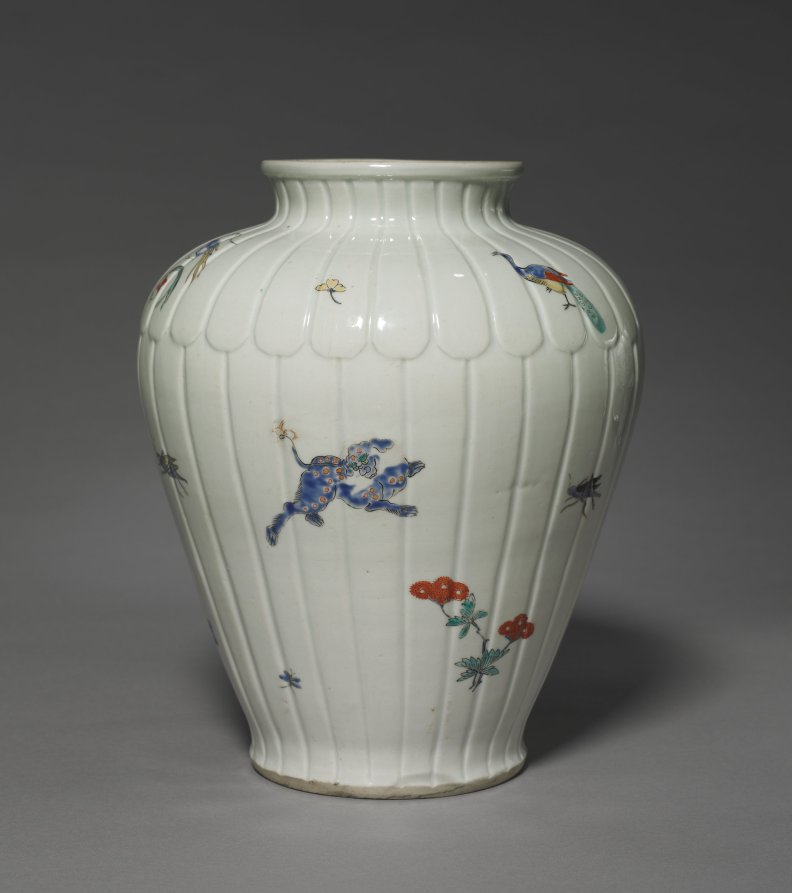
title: Vase with Floral, Insect, Bird, and Chinese Designs: Kakiemon Type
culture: Japan, Edo period (1615–1868)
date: late 1600s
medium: porcelain with overglaze enamel, gilding and carved decoration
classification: Ceramic